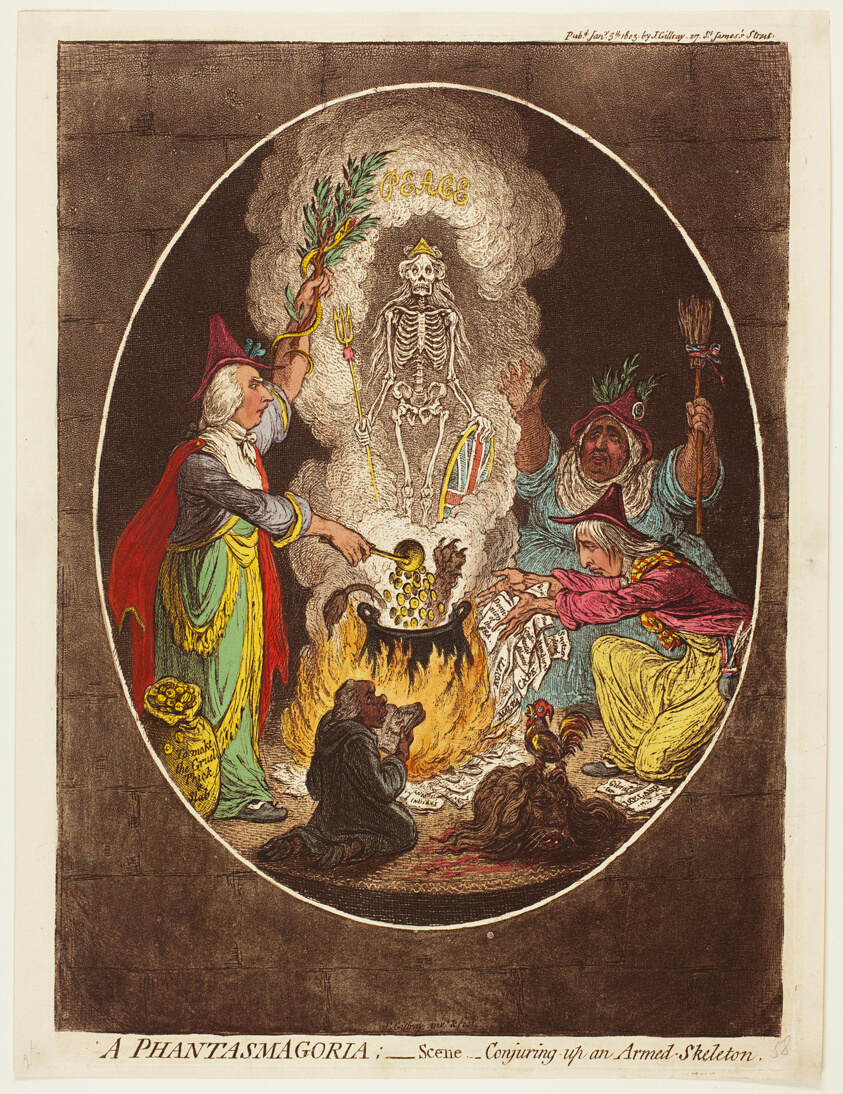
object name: Print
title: A Phantasmagoria - Scene - Conjuring up an Armed Skeleton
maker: James Gillray (English, 1756-1815); published by James Gillray (English, 1756-1815)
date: published January 5, 1803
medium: Hand-colored etching and aquatint on paper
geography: England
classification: etching; print; prints and drawing